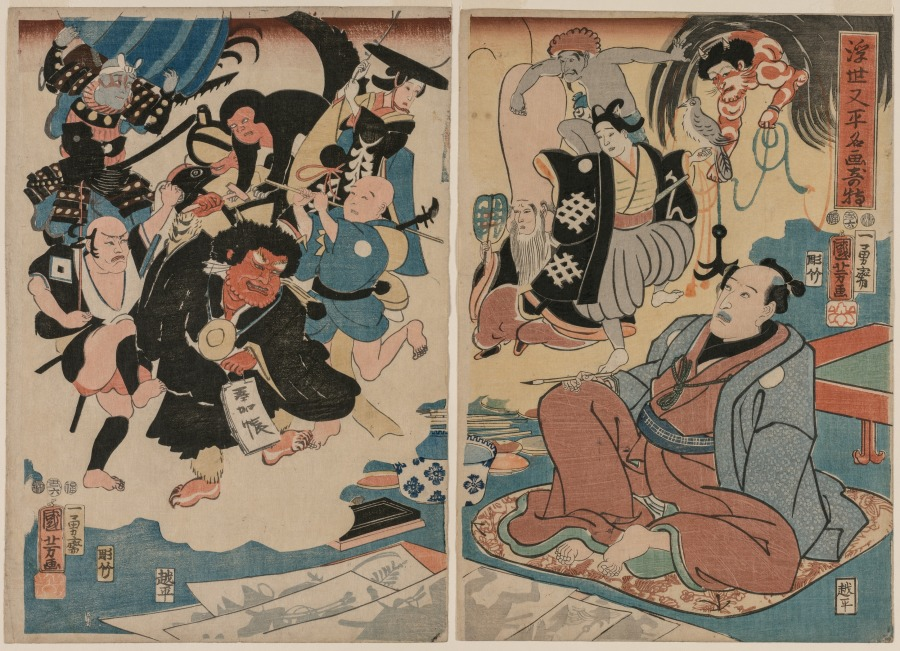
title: The Strange Occurence of Ukiyo Matahei and his Famous Paintings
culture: Japan, Edo period (1615–1868)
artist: Utagawa Kuniyoshi (Japanese, 1797–1861)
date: 1853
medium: color woodblock print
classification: Print